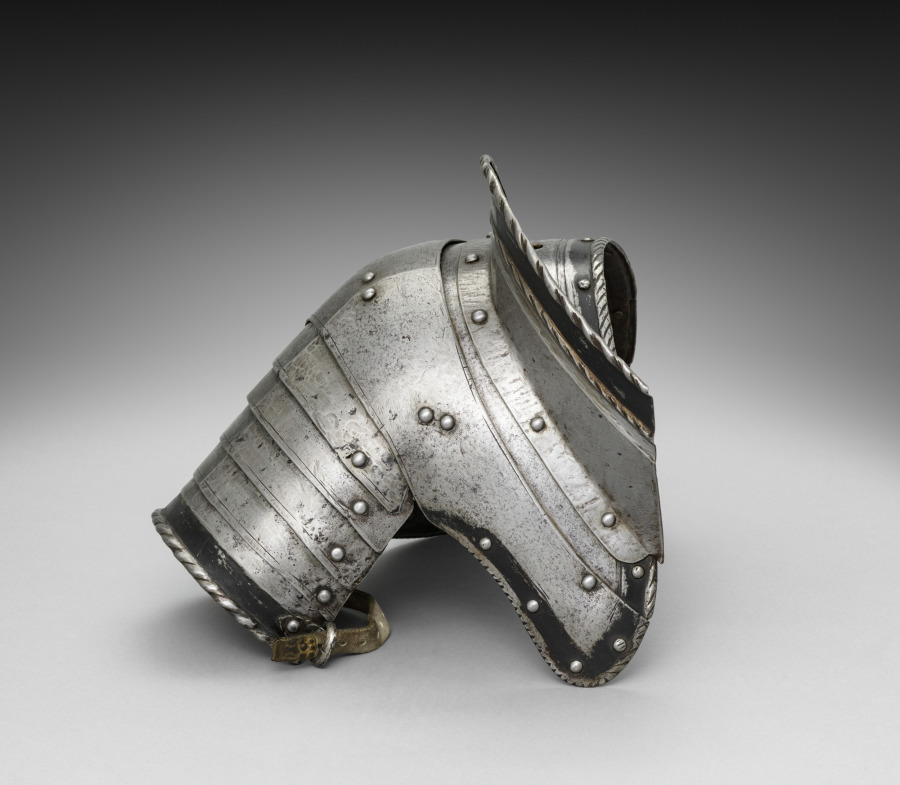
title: Right Pauldron with Guard Brace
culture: Germany, 19th century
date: 1801–1900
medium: steel with black paint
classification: Arms and Armor